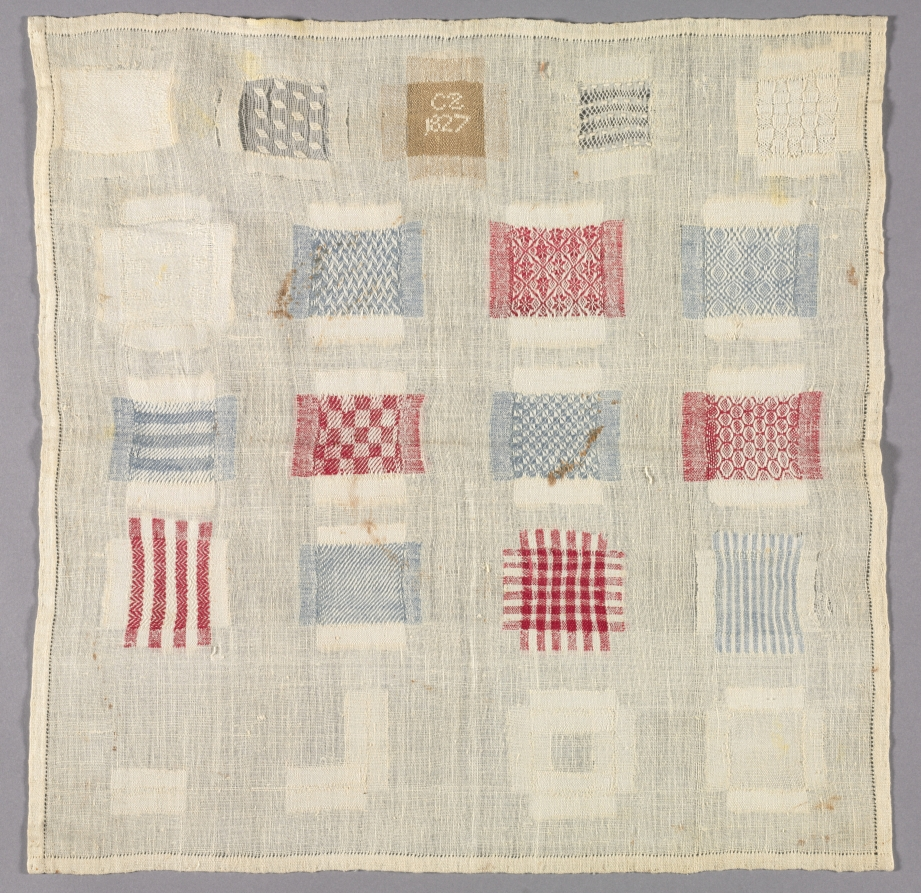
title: Sampler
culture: Germany ?, early 19th century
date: 1827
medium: damask and lace patterns on cotton ground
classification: Sampler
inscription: in center top square: "C. Z./ 1827."